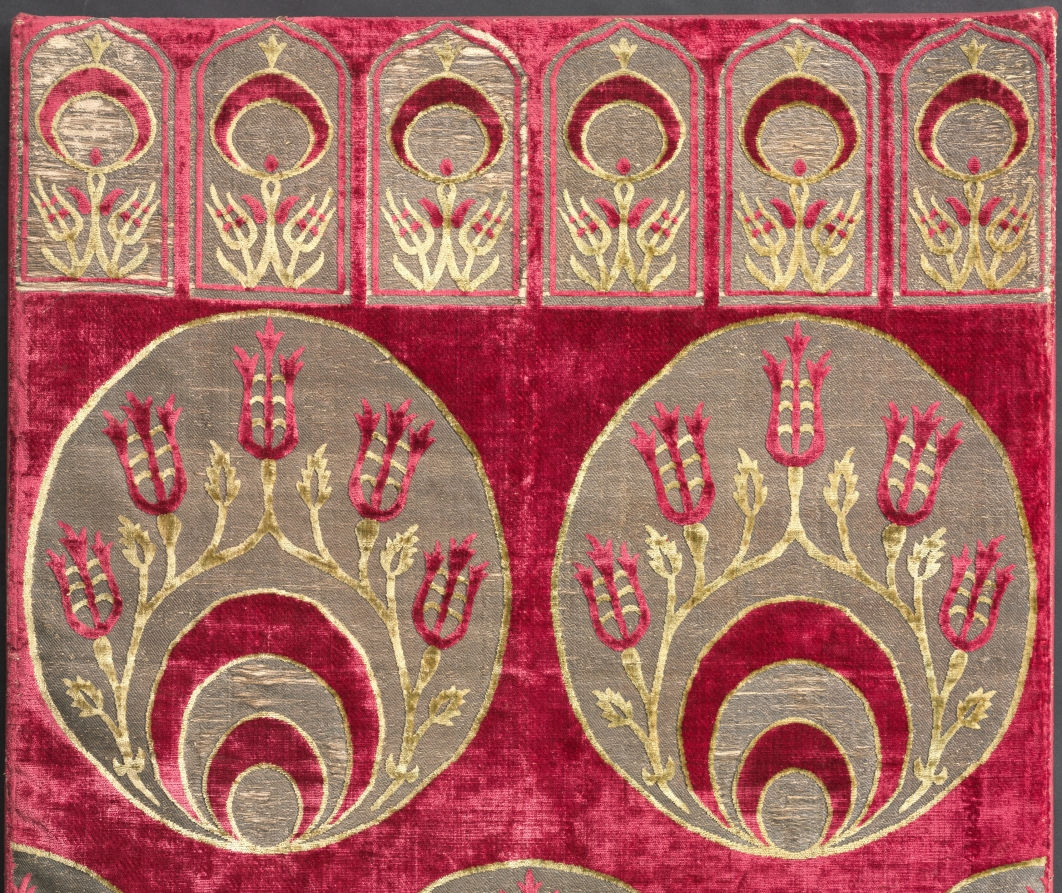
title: Brocaded velvet cushion cover with crescents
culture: Turkey, Istanbul or Bursa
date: 1525–75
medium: velvet, brocaded: silk, gilt- and silver-metal thread, and cotton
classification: Velvet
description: This cushion cover is one of the earliest and highest quality examples that has survived. The vibrant pattern displays large crescents inscribed with smaller crescents and elegant rosebuds on a leafy vine. The six-pointed lappet designs across each end identify its function as a cover for a cushion on a divan, the equivalent of a Western sofa. The elegant yet lively quality of the drawing, velvet weave, and dense metal thread indicate that it was made near the height of Ottoman silk textile production in the mid-1500s.